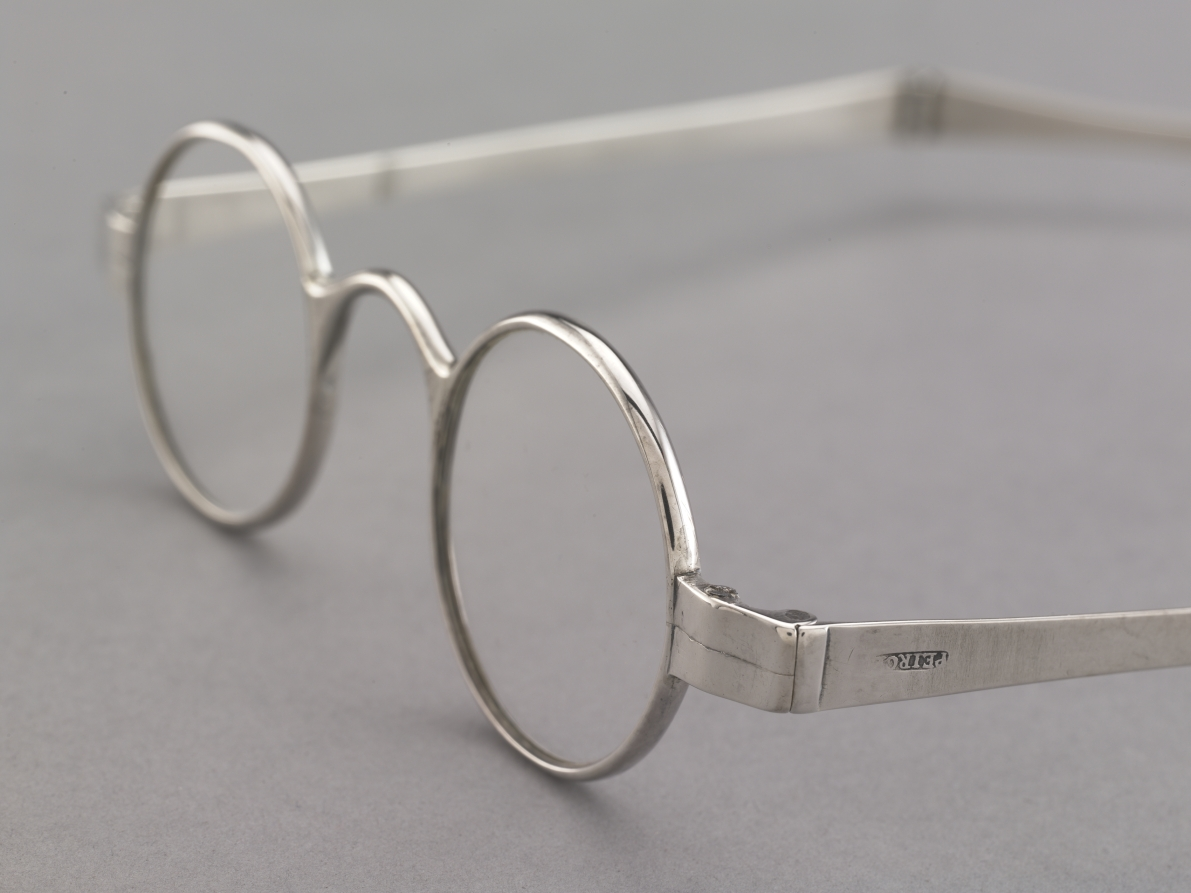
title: Spectacles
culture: America, Massachusetts, Boston, 19th century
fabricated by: John Peirce (American)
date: c. 1816–1820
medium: silver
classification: Silver